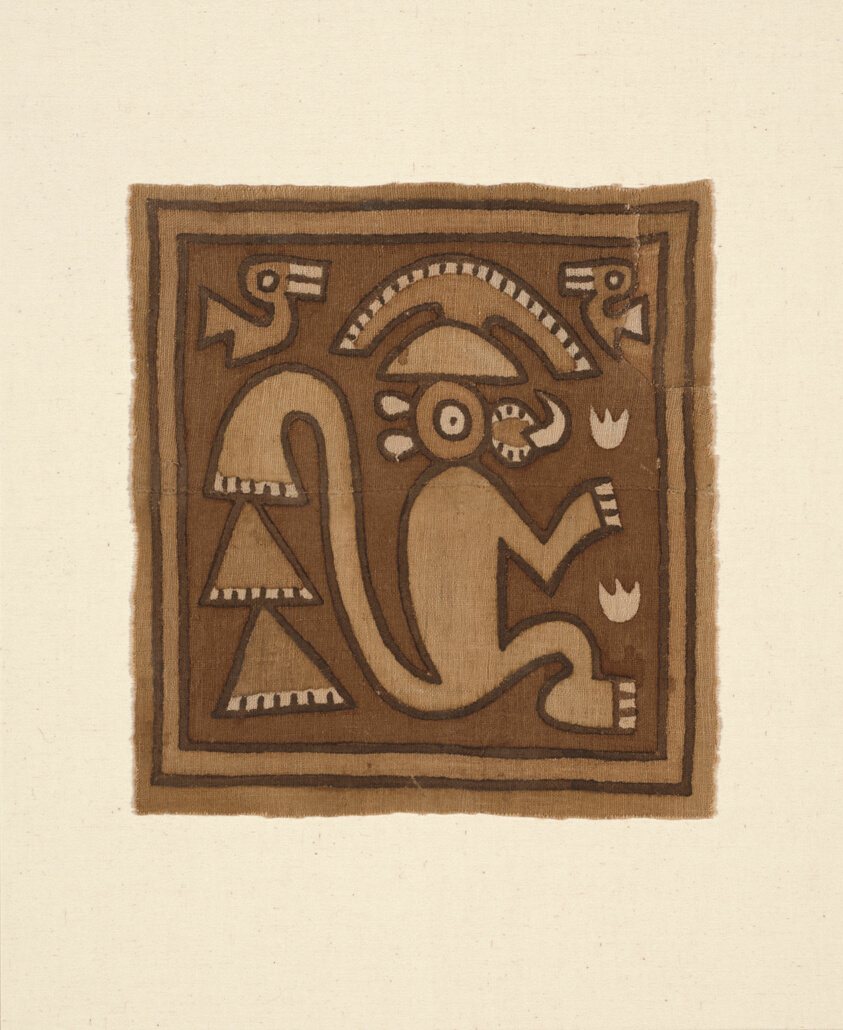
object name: Textile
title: Panel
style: chancay, chimú, late intermediate period, Pre-Columbian, americas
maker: Probably Chancay; Probably central coast, Peru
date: A.D. 1000/1476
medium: Cotton, plain weave; painted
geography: Peru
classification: textile; weaving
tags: anthropomorphic figure, animals, birds, headdresses, mouths, mythological figures, triangles